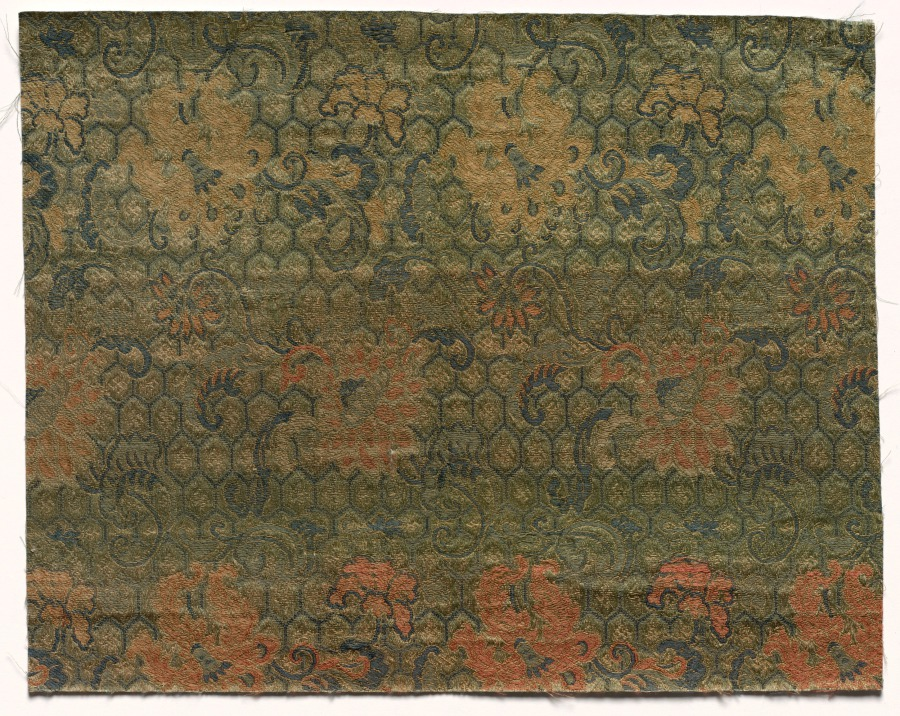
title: Fragment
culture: China, 19th century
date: 1800s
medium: silk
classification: Textile